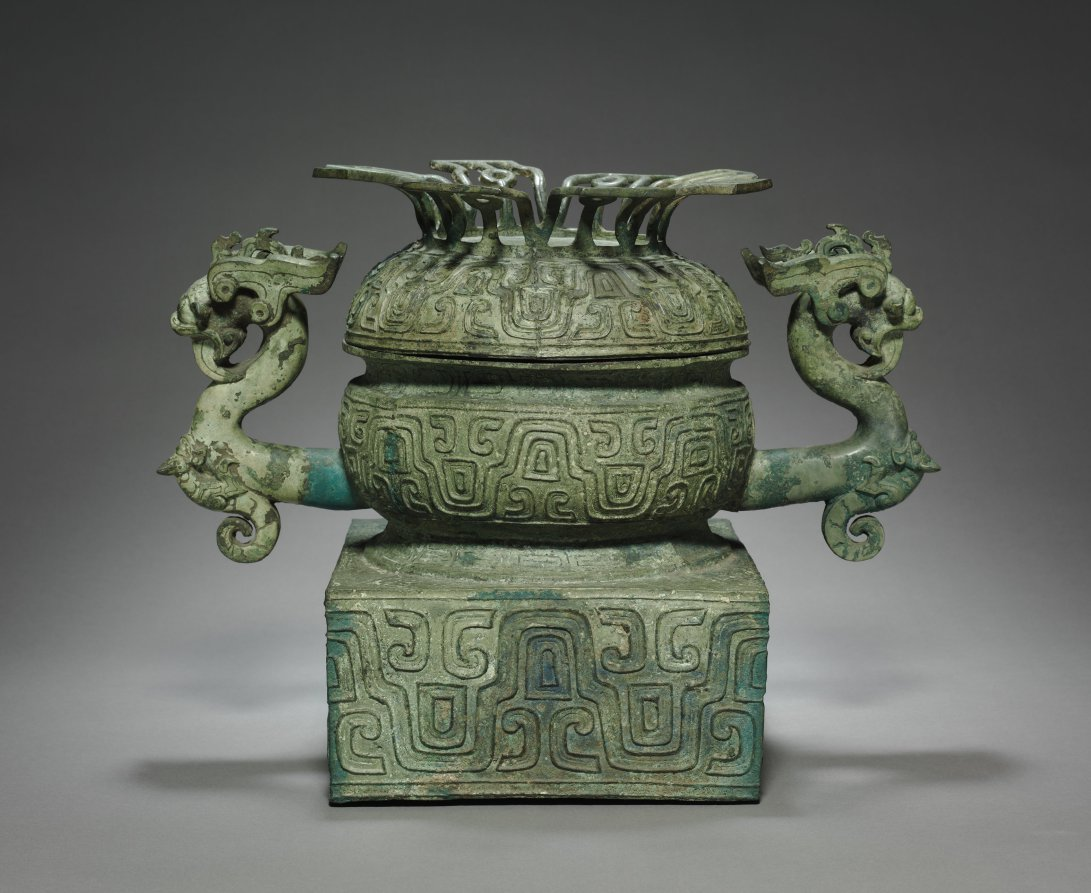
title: Food Container (Gui)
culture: China, Eastern Zhou dynasty (770–256 BCE), Spring and Autumn period (770–476 BCE)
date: 600–500 BCE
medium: bronze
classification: Metalwork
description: Openwork and sculptural designs elaborately transform the silhouette of this gui, a ritual food vessel with a square pedestal. The design exudes motion, exuberance, and baroque characters to a stately vessel form. Lotus-petal openwork encircles the cover, reinforcing the linear rhythms of the undulating wave patterns on the body. Two lively dragons, with eyes and mouth wide open and tongue straight out, are accompanied by two felines to form the arched handles.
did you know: This ritual food vessel likely held grain like rice, millet, or corn in rites for worshipping the ancestors.